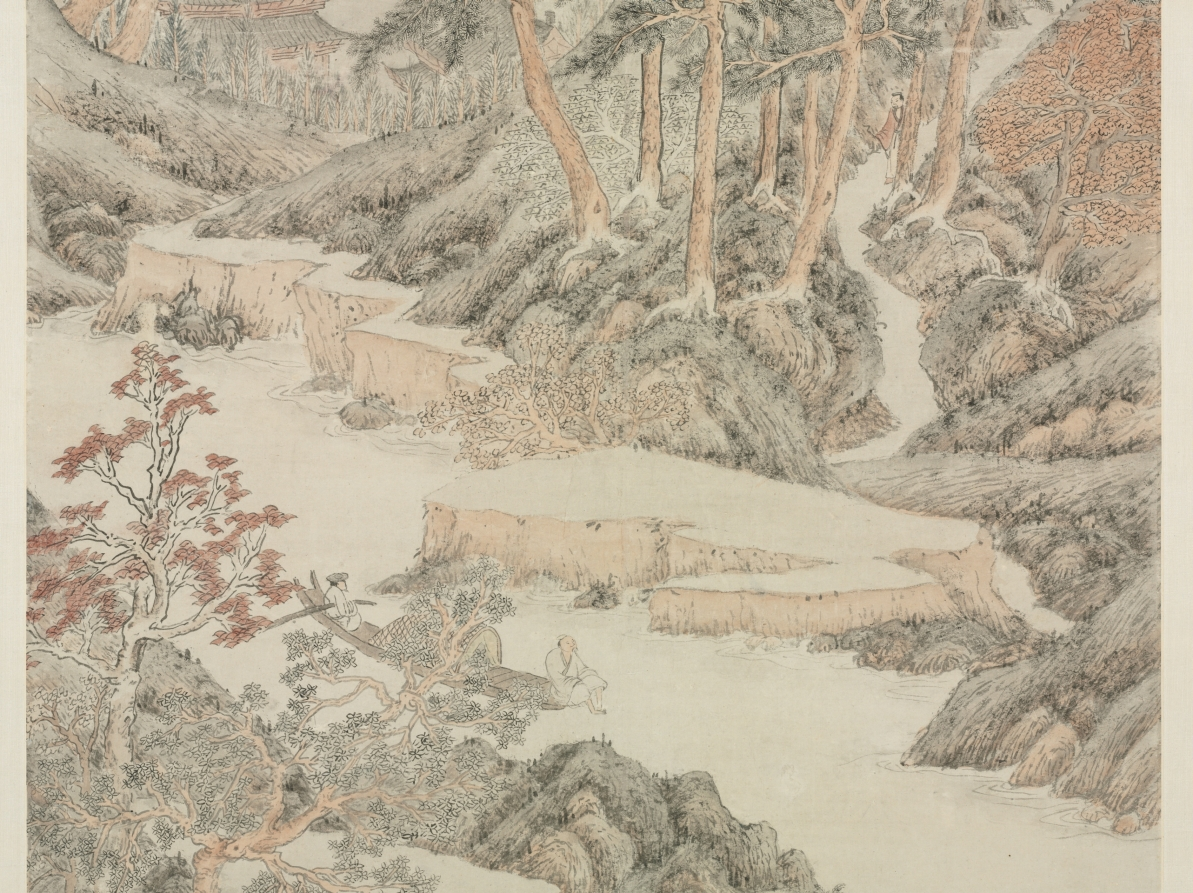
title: Washing the Feet (from the Dusty World)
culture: China, Ming dynasty (1368–1644)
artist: Wen Boren (Chinese, 1502–1575)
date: 1570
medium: Hanging scroll mounted on a panel; ink and color on paper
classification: Painting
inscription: Artist's inscription, signature, and 4 seals: Shaking one's clothes on a thousand-jen peak,/ Washing one's feet in a ten-thousand-li stream. In the gengwu year of the Longqing era [1570], fifteenth day of the tenth month, Wufeng shanren, Wen Boren recorded a special occasion. [2 seals] Wufeng shanren; Wen Boren Te-ch'eng chang. [2 seals, lower right corner] Te-ch'eng; She-shan chang. trans. HR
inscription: 2 additional seals of Zhang Heng 張珩 (1915-1963)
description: A scholar on a boat in the middle ground bathes his feet in the cooling stream. The vast river scene is depicted from a high viewing point. The motif of a scholar washing his feet illustrates the phrase, “When the waters of the Canglang are clear, I wash my capstrings. When the waters of the Canglang are muddy, I wash my feet [only]” (from Songs of Chu, written before 256 BC). The passage evokes the image of the virtuous scholar-official who avoids government service when the ruler is corrupt (the rivers are muddy) and resumes service (washing my capstrings) when the waters are clear. Whether the artist here alludes to unfavorable times of government is not clear.